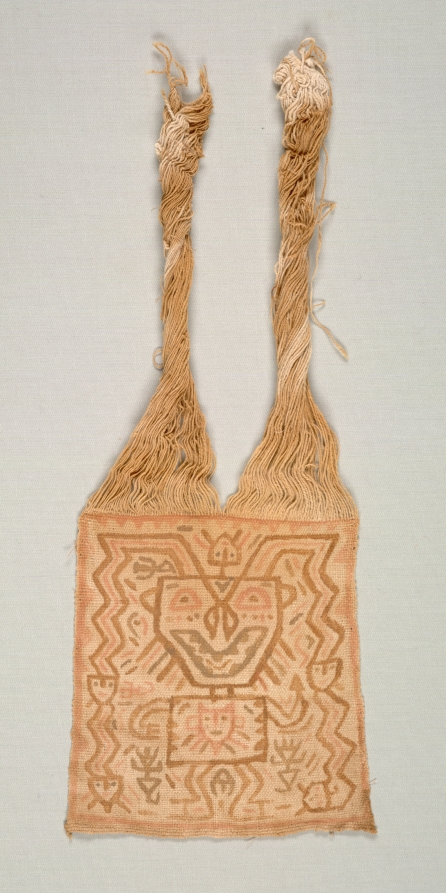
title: Mummy Bundle "Mask"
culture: Peru, South Coast, Ica Valley, Ocucaje site, Paracas style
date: 200–1 BCE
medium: cotton: plain warp-faced cloth, painted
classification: Textile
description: The Paracas people buried their dead in pear-shaped mummy bundles, created by carefully wrapping the seated human body in layers of garments and other textiles. Sometimes a painted cloth was placed on the outer layer at the top of the bundle, as though it served as the bundle’s face, head, or “mask.” Some cloths were painted with masklike faces, although others—such as this example—feature complete figures, which may be mythological beings with supernatural appendages.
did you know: These masks fall into two categories, those with only a face and those with a full-bodied figure.